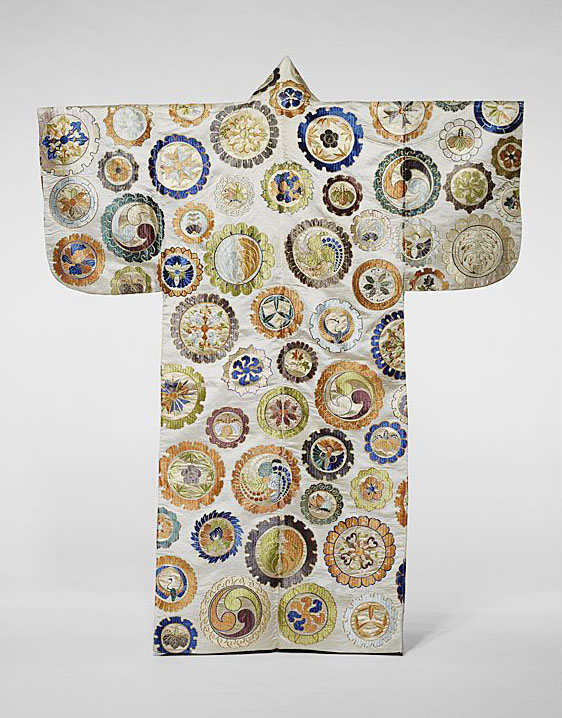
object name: Textile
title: Nuihaki (Noh Costume)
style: late edo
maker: Japan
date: Late Edo period (1789–1868), 1801/25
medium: Silk, warp-float faced 7:1 satin weave; patterned with impressed gold leaf; embroidered with silk and gold-leaf-over-lacquered-paper-strip-wrapped cotton in satin and single satin stitches; laid work and couching; lined with silk, plain weave; dyed with beni, safflower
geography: Japan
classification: needlework - costume; needlework (visual works); textile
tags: costumes